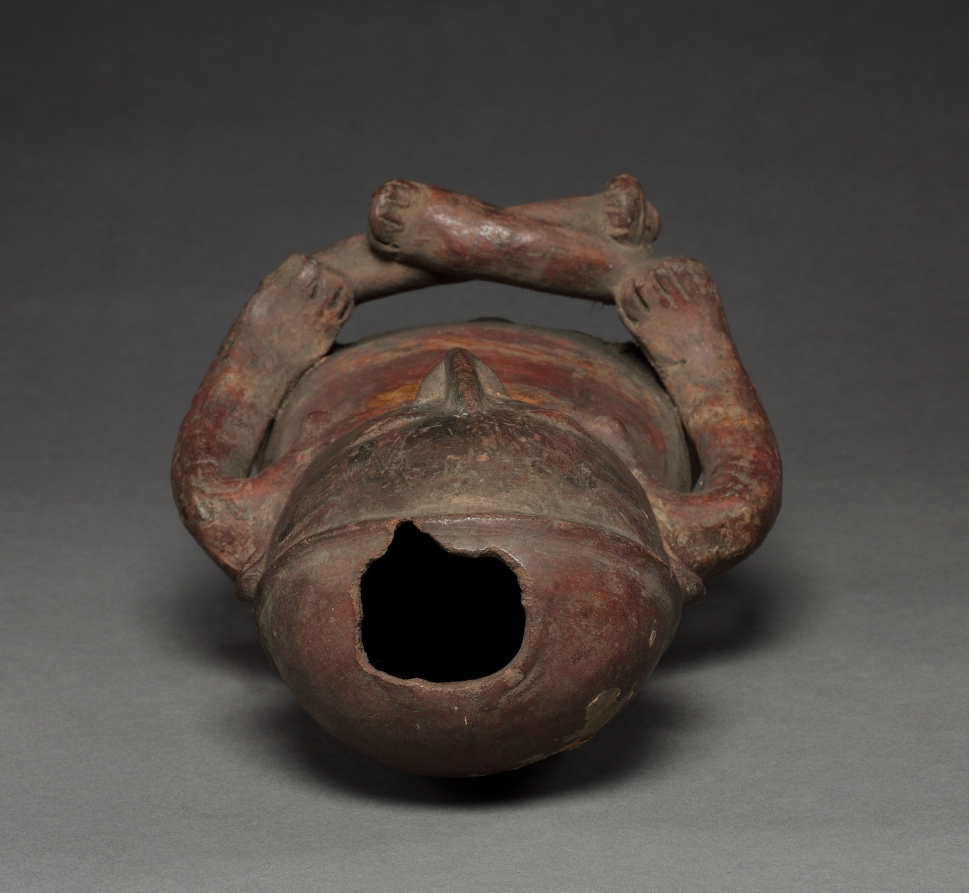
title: Seated Figure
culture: Colombia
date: before 1921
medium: red ware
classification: Ceramic